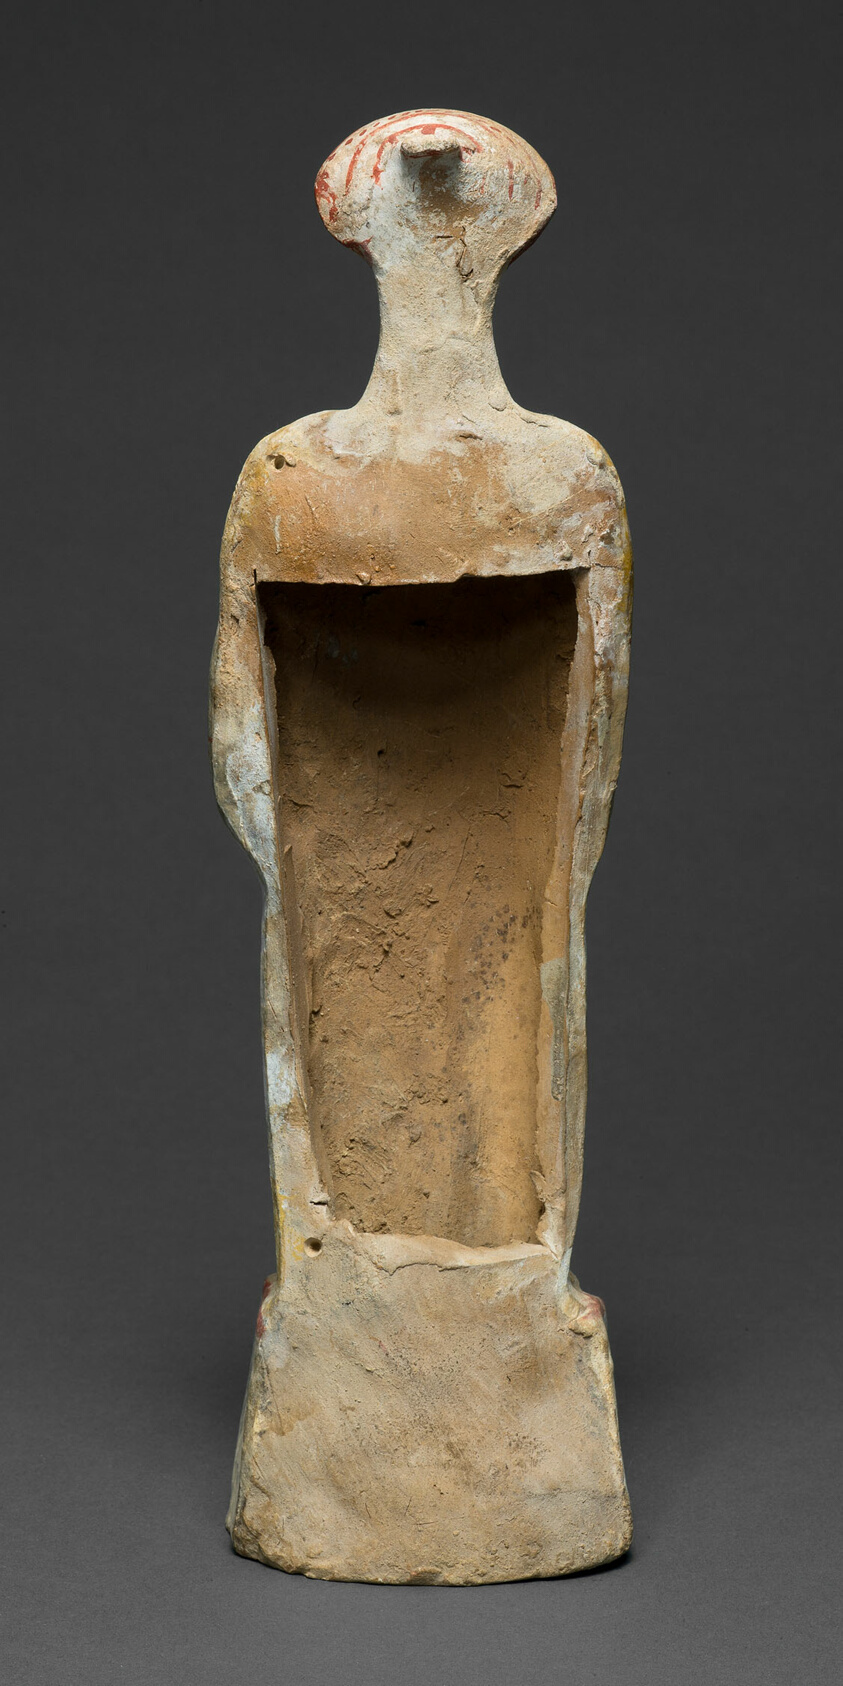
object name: Sculpture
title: Statuette of a Woman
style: greek, ancient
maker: Greek; Boeotia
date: about 450 BCE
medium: terracotta, polychromy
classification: statuette; sculpture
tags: woman, beauty, rituals